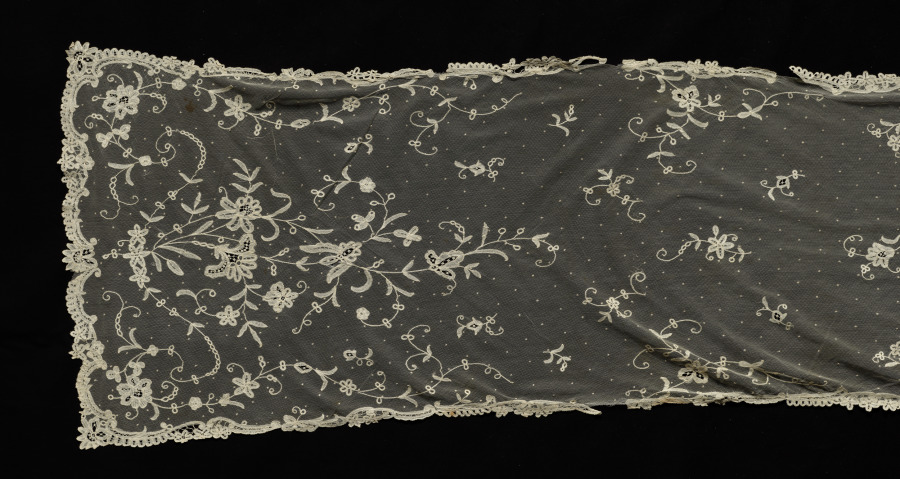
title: Lace Scarf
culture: Belgium, Brussels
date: 1800s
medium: Machine-made lace net: linen bobbin lace appliqué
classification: Lace